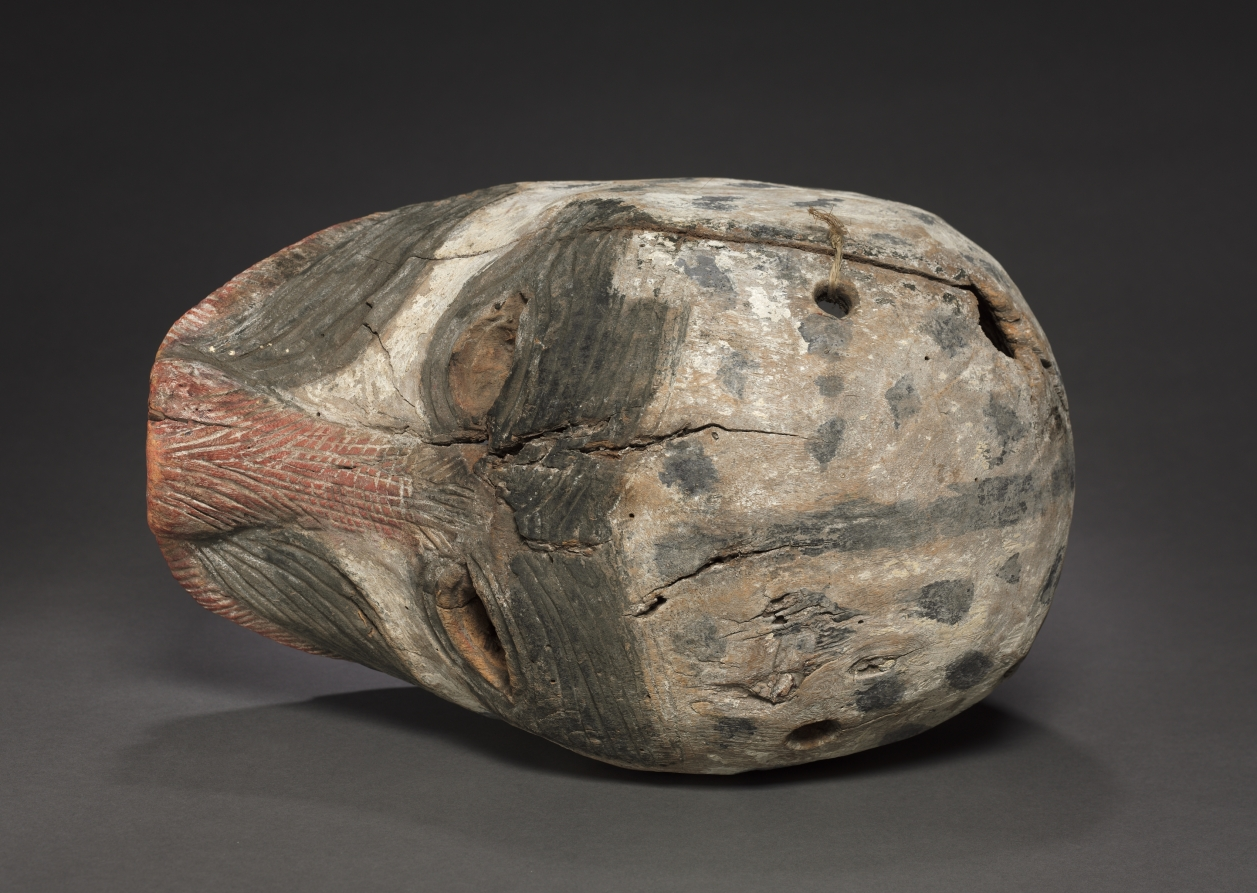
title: Mask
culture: Mexico, Paintla, 19th century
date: 1800s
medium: wood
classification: Sculpture